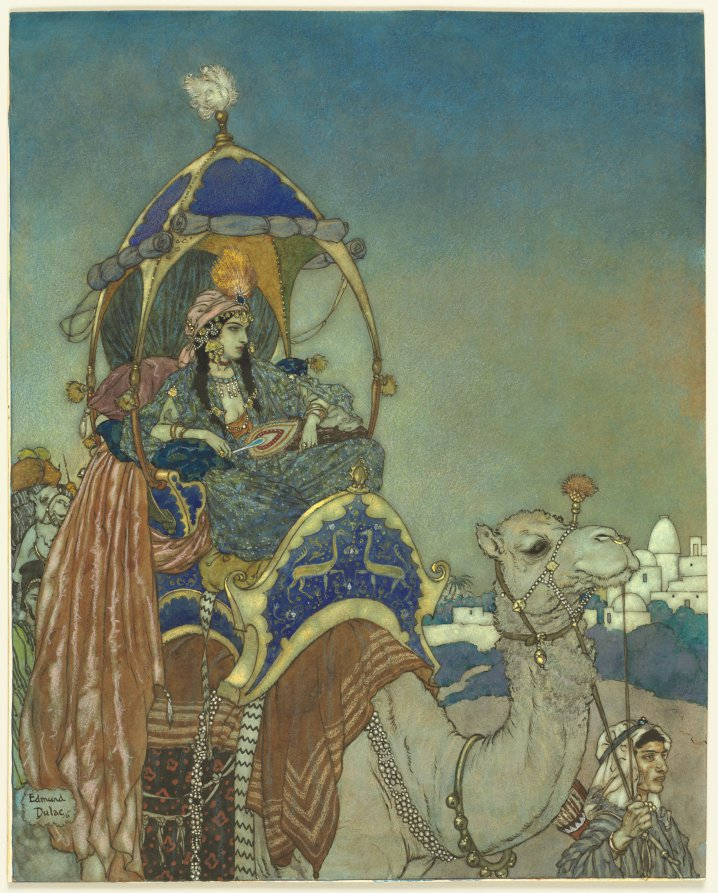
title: The Queen of Sheba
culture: England, 20th century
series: L’Illustration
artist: Edmund Dulac (British, 1882–1953)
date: 1911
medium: Pen and brown ink, watercolor, and gouache, with graphite and color wax crayon, on artist’s drawing board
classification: Drawing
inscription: signed and dated, in black ink, at lower left: Edmund / Dulac 11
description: A celebrated artist of the golden age of British book illustration, the French-born Edmund Dulac was inspired by Persian miniatures and manuscript illustration. This watercolor was one of a series of four scenes painted to accompany a poem by André Dumas, Figures of the Orient. Dulac depicted legendary enchantresses of the East: Circe, Salome, Scheherazade, and here, the Queen of Sheba. Aloft a camel, the dark-haired beauty languorously surveys the arid landscape as she and her entourage approach the Holy Land. Vibrant silks spill out of the queen’s gold and lapis howdah, a veritable mosaic of texture and pattern.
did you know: Edmund Dulac was such a devoted Anglophile that as a student his contemporaries referred to him as "l'Anglais" (English).